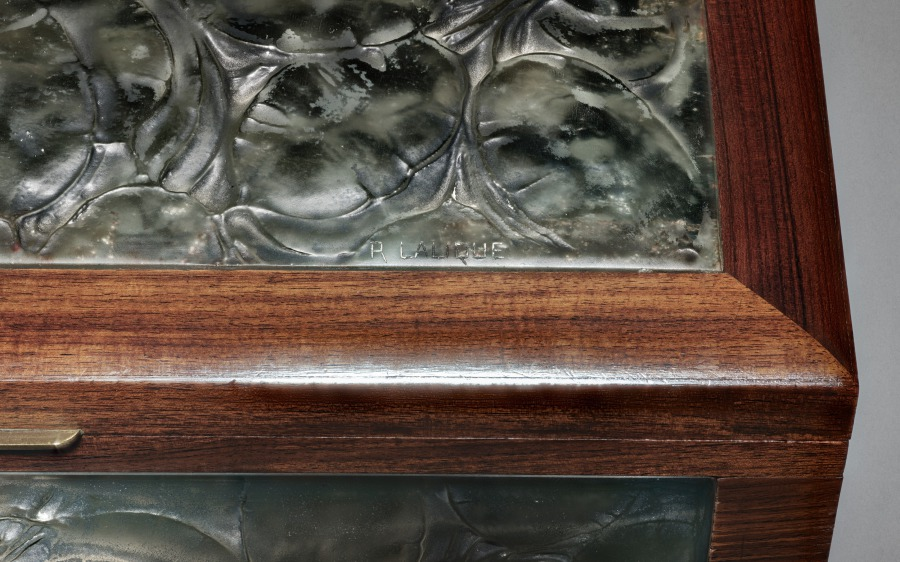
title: Monnaie du Pape Coffer (coffret)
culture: France, 20th century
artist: René Lalique (French, 1860–1945)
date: c. 1914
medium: wood, bombé glass panels with gray patina, metal key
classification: Mixed Media